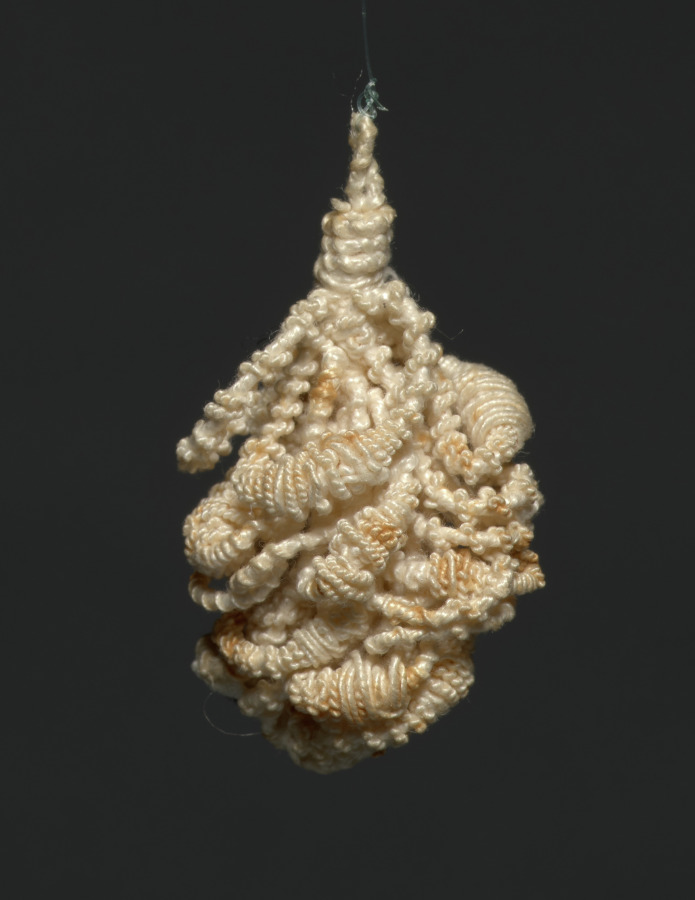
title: Lace Tassel (one of a pair)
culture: Italy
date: 1560–99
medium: lace (wrapping)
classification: Lace